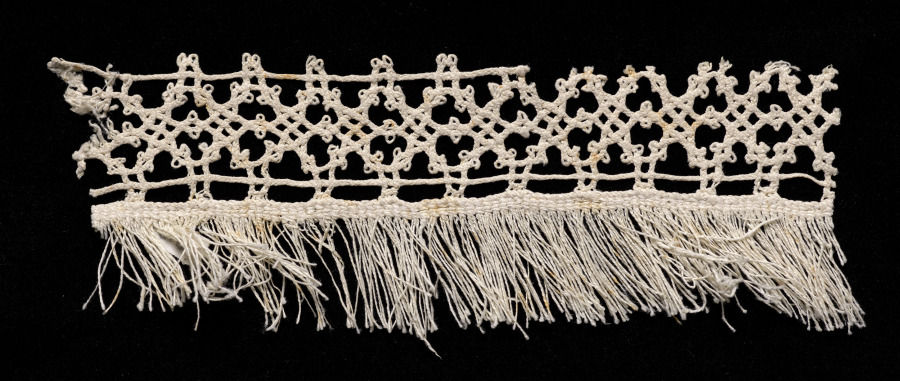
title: Lace Insertion with Fringe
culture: Italy, Venice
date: 1540–60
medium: Bobbin lace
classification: Lace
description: The design of this fringed bobbin lace fragment is like those for laces made of gold, silver, and colored silk threads.